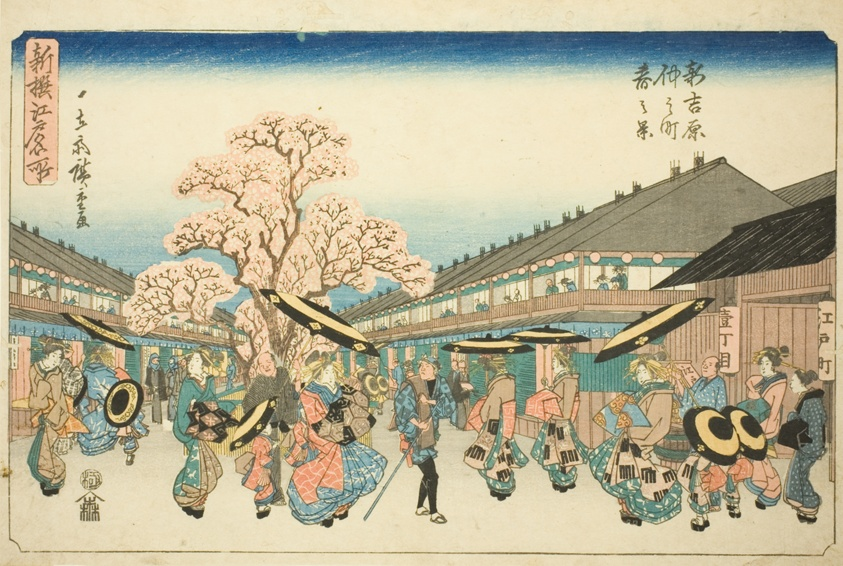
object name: Print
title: Spring Scene of Nakanocho in the New Yoshiwara (Shin Yoshiwara Nakanocho haru no kei), from the series "Newly Selected Famous Places in Edo (Shinsen Edo meisho)"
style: Japanese (culture or style)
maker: Utagawa Hiroshige 歌川 広重; Japanese, 1797-1858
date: c. 1839/42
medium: Color woodblock print; oban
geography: Japan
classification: woodblock print; print; asian art